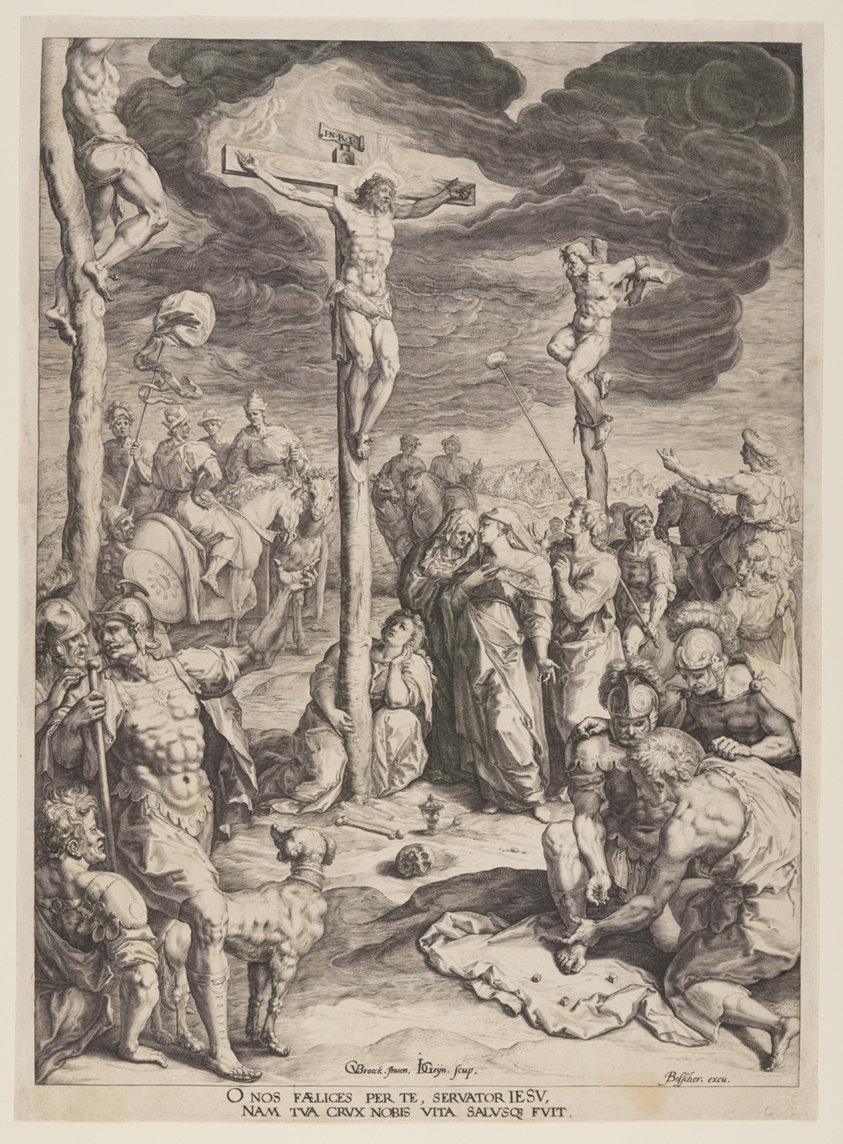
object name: Print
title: Christ on the Cross between Two Thieves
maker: Jacques de Gheyn II (Dutch, 1565–1629); after Crispin van den Broeck (Netherlandish, 1524–c.1590)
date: c. 1590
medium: Engraving on ivory laid paper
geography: Netherlands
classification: engraving; paper; print; prints and drawing